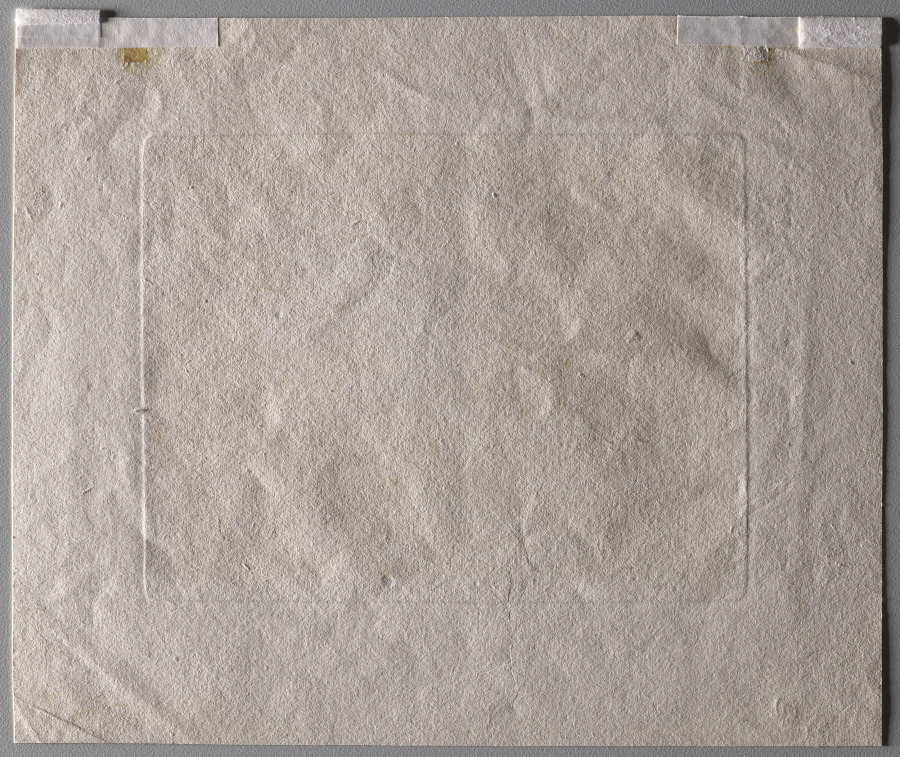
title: Norwegian Seacoast During a Storm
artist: Johan Christian Clausen Dahl (Norwegian, 1788–1857)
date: 1819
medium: etching, open-bite, black ink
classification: Print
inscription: Signed and dated in the pale below image, lower left: Dahl, 1819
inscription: Watermark: IN. BASEL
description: Johan Christian Clausen Dahl depicted his native Norway in dramatic landscapes that used figures to evoke the grandiose scale of nature. This etching—one of four created by the artist—shows the aftermath of a storm. A ship floats damaged in the distance while a man and his dog sit despondent on a massive rock nearby. Dahl rendered the sky and churning waves in jagged etched lines that suggest the violent movement and force of the sea outside Bergen, where he grew up. He considered this composition to be among his very best works.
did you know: Johan Christian Clausen Dahl described this print in his diary as depicting “the morning after a stormy night where a man has escaped from a ship stranded on the rocks.”